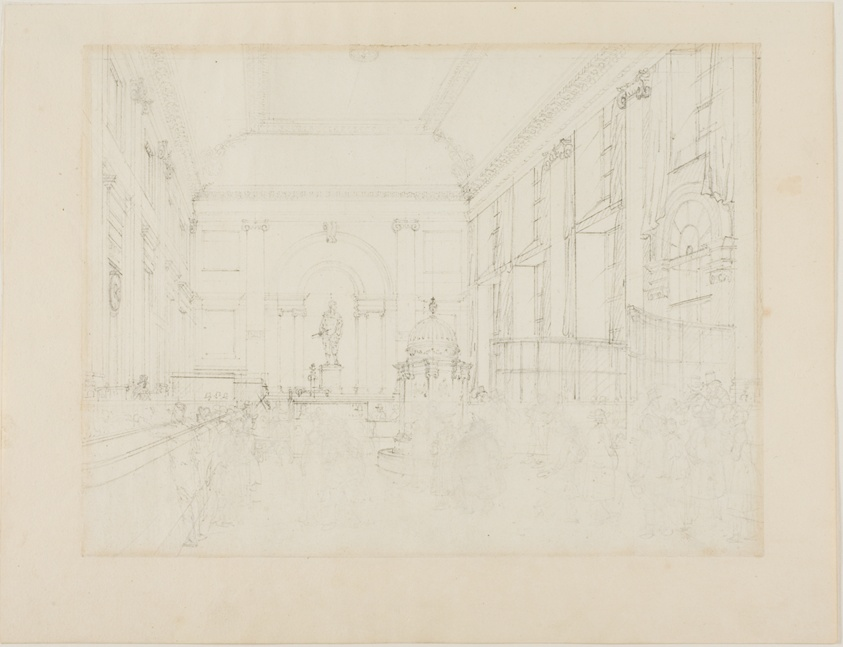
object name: Drawing and Watercolor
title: Study for the Great Hall, Bank of England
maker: Augustus Charles Pugin (English, born France, 1762-1832); Thomas Rowlandson (English, 1756-1827)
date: c. 1808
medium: Graphite on ivory wove paper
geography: England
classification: graphite; drawings (visual works); prints and drawing